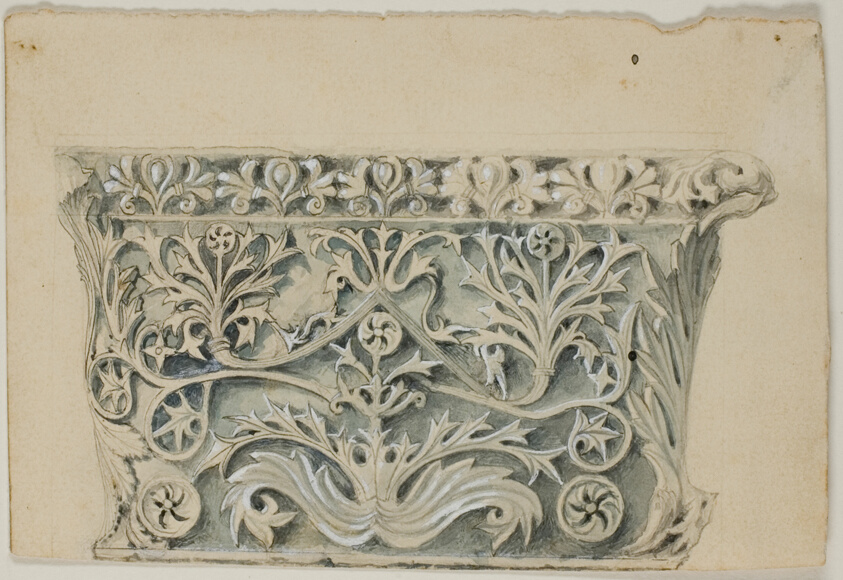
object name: Drawing and Watercolor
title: Byzantine Column Capital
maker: John Ruskin (English, 1819-1900)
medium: Pen and black ink, with brush and gray wash and white gouache, over taces of graphite, on cream wove paper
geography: England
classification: ink or chalk wash; drawings (visual works); prints and drawing